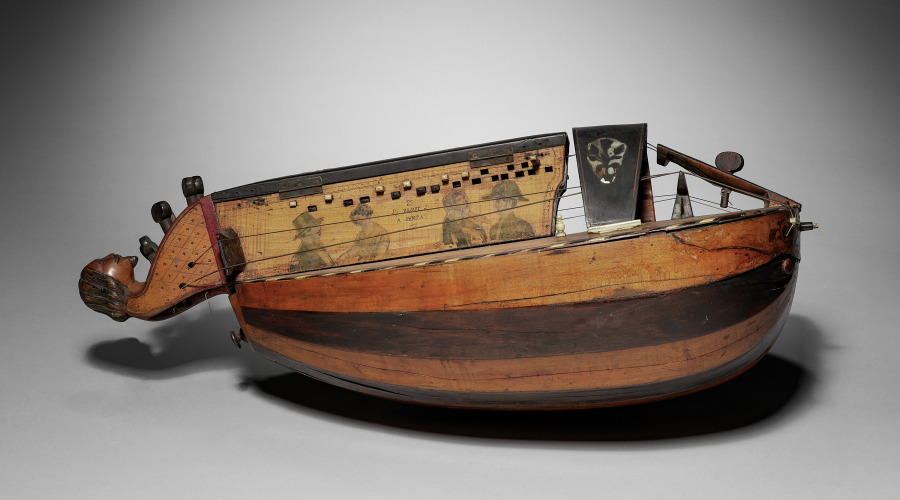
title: Vielle à roue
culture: France, 18th century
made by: Pajot of Jánzat (French)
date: 1700s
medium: wood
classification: Musical Instrument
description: The instrumentalist could play melodies on the keyboard that presses tangents against one or more strings. Often there are also multiple drone strings, which give a constant pitch accompaniment to the melody, resulting in a sound similar to that of bagpipes. This type of instrument is depicted in several artworks in the CMA collection: 1924.656, 2008.34.2, 1960.20. The vielle à roue is also related to the Swedish nyckelharpa, which was featured on the CMA performing arts series in 2017 played by Emilia Amper.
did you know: Also known as a “hurdy-gurdy” or “wheel fiddle,” this instrument produces sound by a hand crank-turned rosined wheel rubbing against the strings.